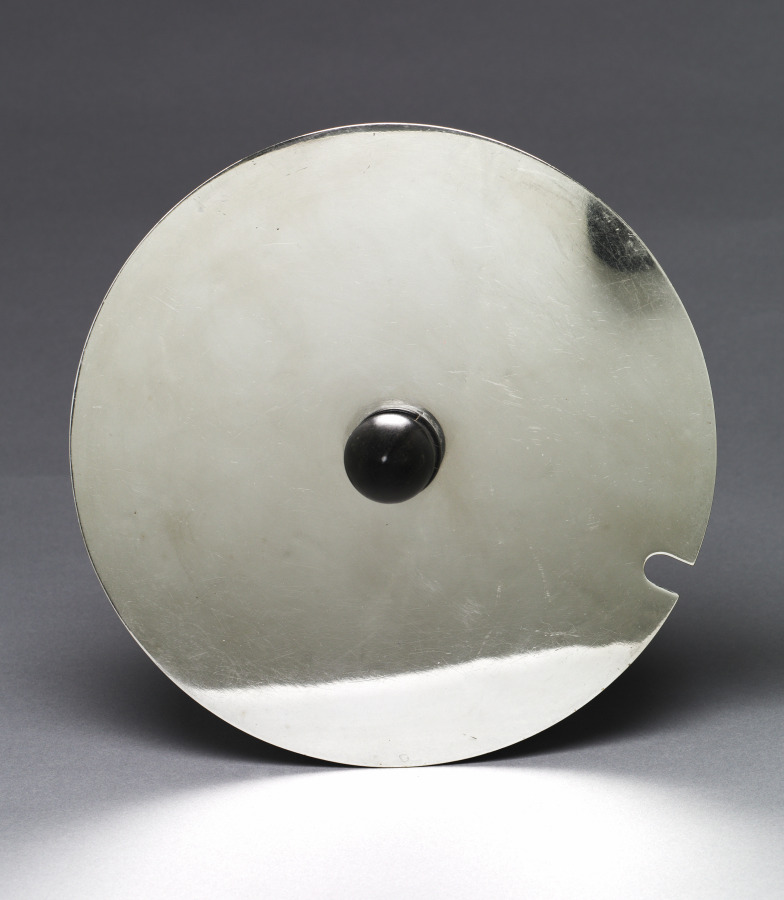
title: Cover for a Tureen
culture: England, 19th century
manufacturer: Hukin & Heath (British)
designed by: Christopher Dresser (British, 1834–1904)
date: c. 1880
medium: silver plated metal, ebony handles and knop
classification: Metalwork